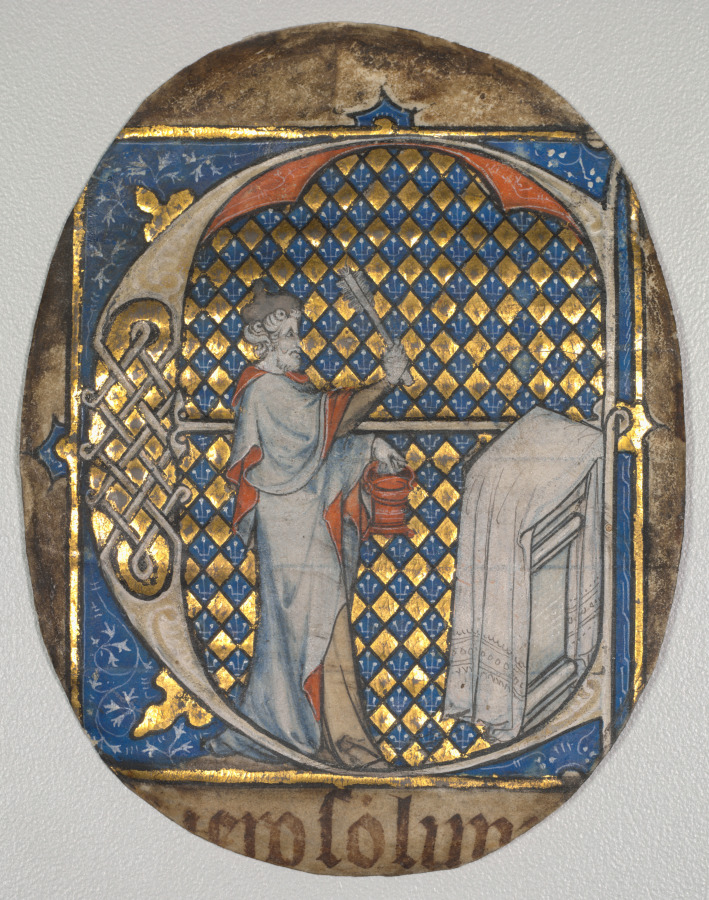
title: Fragment from a Lectern Bible: Initial E[t fecit Josias] with Josiah Aspersing the Altar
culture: France, Paris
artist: circle of Master Honoré (French, Paris, active 1288–1300)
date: c. 1300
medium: ink, tempera, and gold on vellum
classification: Manuscript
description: This initial comes from a large bible (about 23 inches high) and introduces the opening text of the Book of Esdras: Et fecit Josias in Jerosolymis Domino (When Josiah celebrated the Passover festival in Jerusalem to his Lord). The artist, a close follower of Master Honoré at Paris, set his figure against a diapered ground of alternating gold and blue diamonds with fleur-de-lys. Instead of portraying Josiah as a Jew, however, the artist abandoned historical perspective and painted him as a Christian priest sprinkling the altar with holy water in preparation for the Mass.